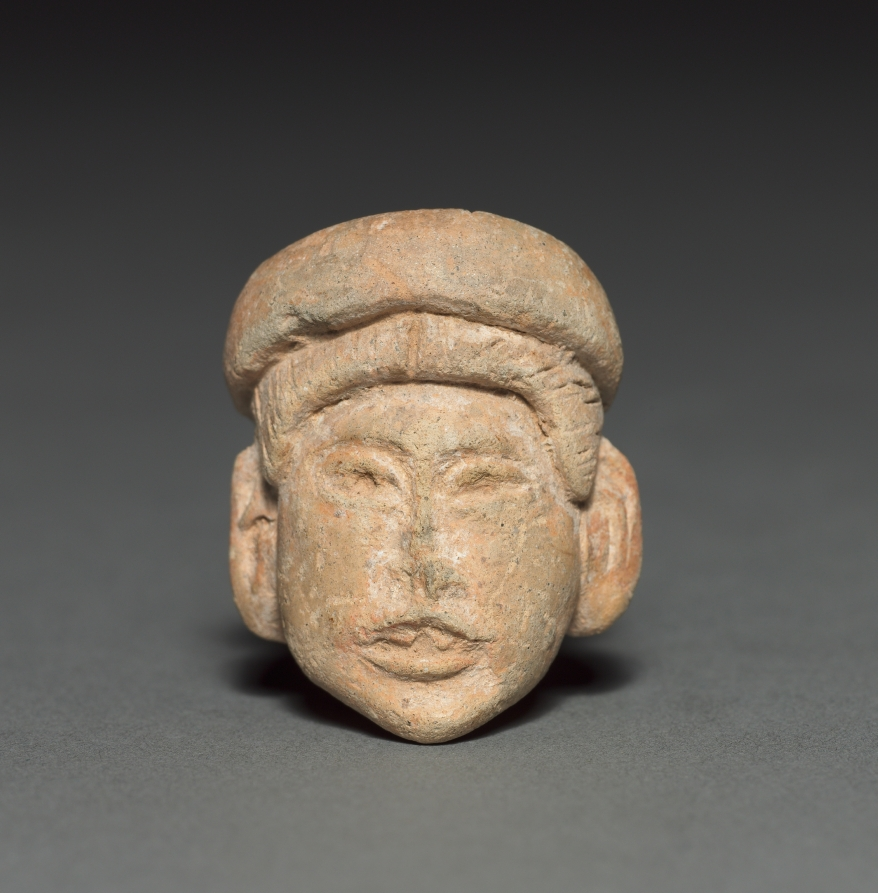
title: Figurine Head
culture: Mexico, Guerrero, Xochipala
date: 1500–1000 BCE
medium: pottery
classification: Sculpture